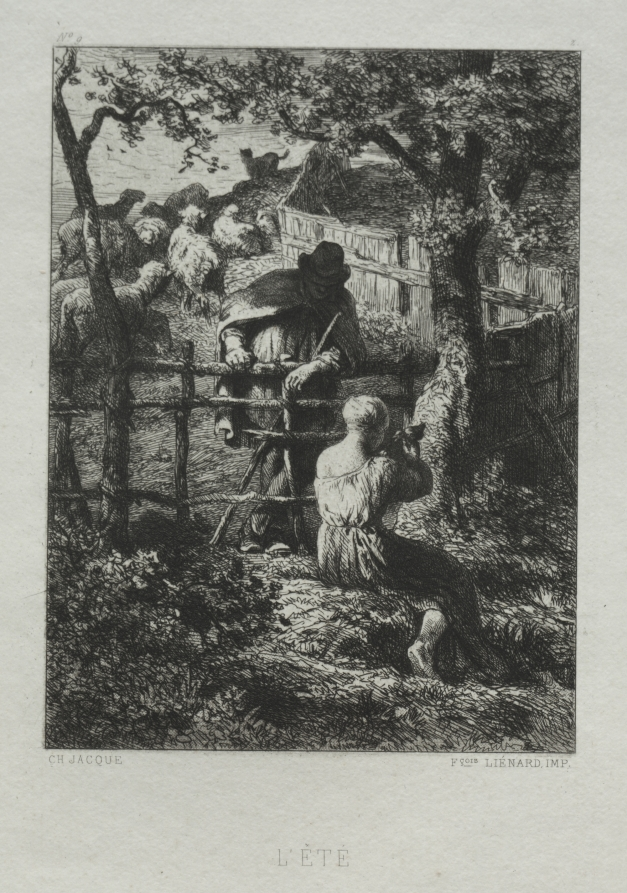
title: Summer Day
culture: France, 19th century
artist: Charles-Émile Jacque (French, 1813–1894)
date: 1864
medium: etching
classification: Print